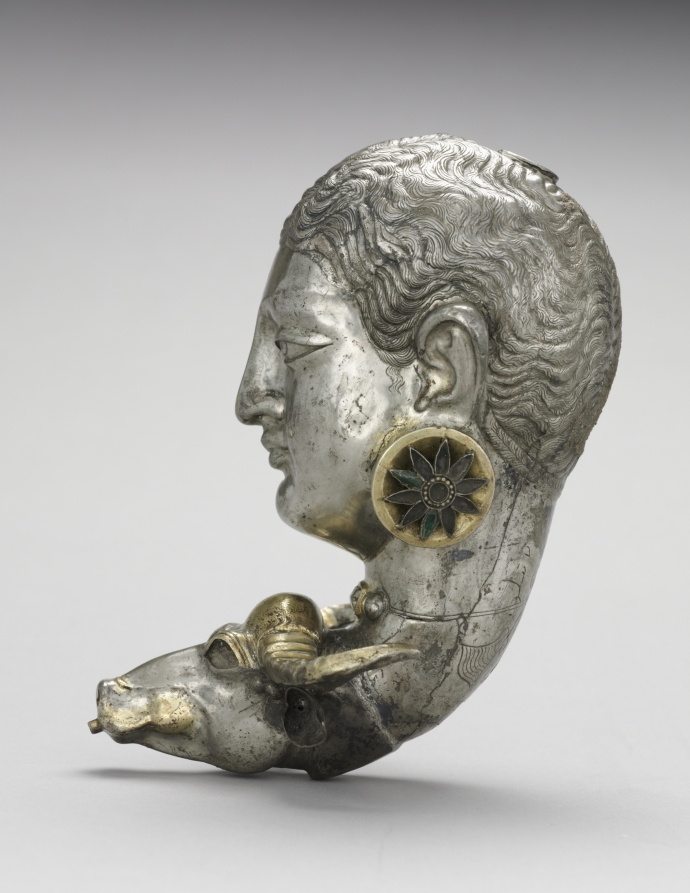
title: Woman and Water Buffalo Rhyton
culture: Sasanian, Iran, 600s or Turk Shahi dynasty, Kabul, Afghanistan, 500s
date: 500–700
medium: silver, with mercury gilding and glass inlays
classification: Metalwork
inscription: ?? 50 ZWZN 3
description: Recalling both Greek and Iranian traditions of head vases and rhyta (drinking horns), this unusual silver vessel combines the heads of a woman and a water buffalo. A filling hole on top and a pouring or drinking spout in front make clear its function. An inscription in Middle Persian on its back records its weight: probably 50 staters and three drachmae (close to its current weight of just over 700 grams, or about 1-1/2 pounds). The woman’s flat brow, straight nose, and widely set, heavy-lidded eyes—along with the sectarian mark in gold on her forehead—relate to art of the Indus River Valley and Hindu Kush regions of today’s Pakistan and Afghanistan. While we do not know for sure, numerous scholars have suggested that she may depict the Indian warrior goddess Durga, slayer of the buffalo demon.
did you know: Inlays once filled the buffalo eye sockets, perhaps of colored glass like that still present within some petals of the disc-shaped earrings.